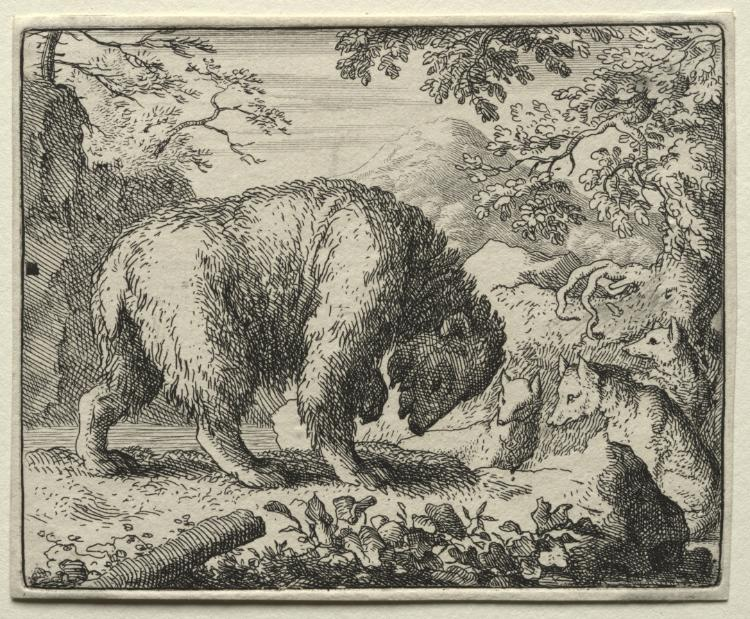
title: Reynard the Fox: Reynard Promises Honey to the Bear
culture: Netherlands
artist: Allart van Everdingen (Dutch, 1621–1675)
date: 1650–75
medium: etching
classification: Print